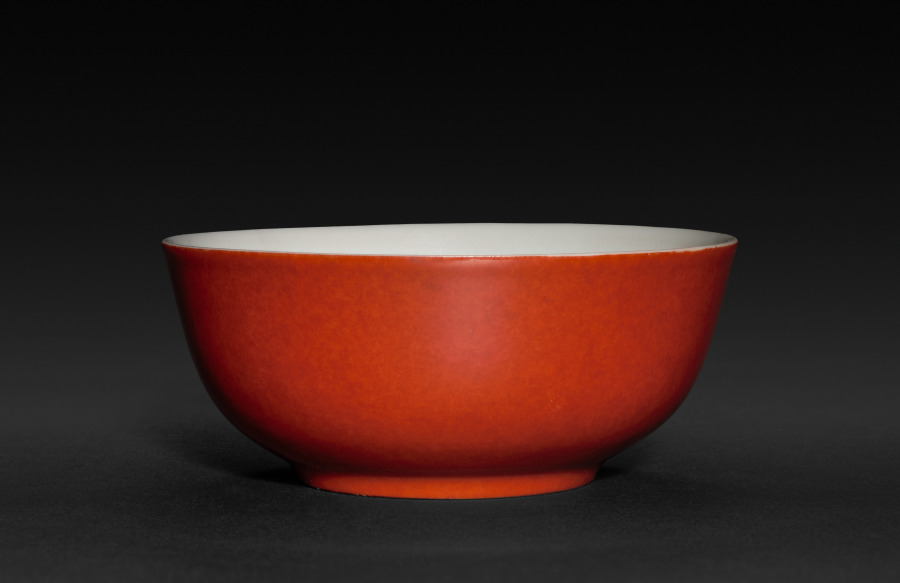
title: Bowl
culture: China, Jiangxi province, Jingdezhen kilns, Qing dynasty (1644-1911), Yongzheng reign (1722-35)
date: 1723–35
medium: porcelain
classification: Ceramic